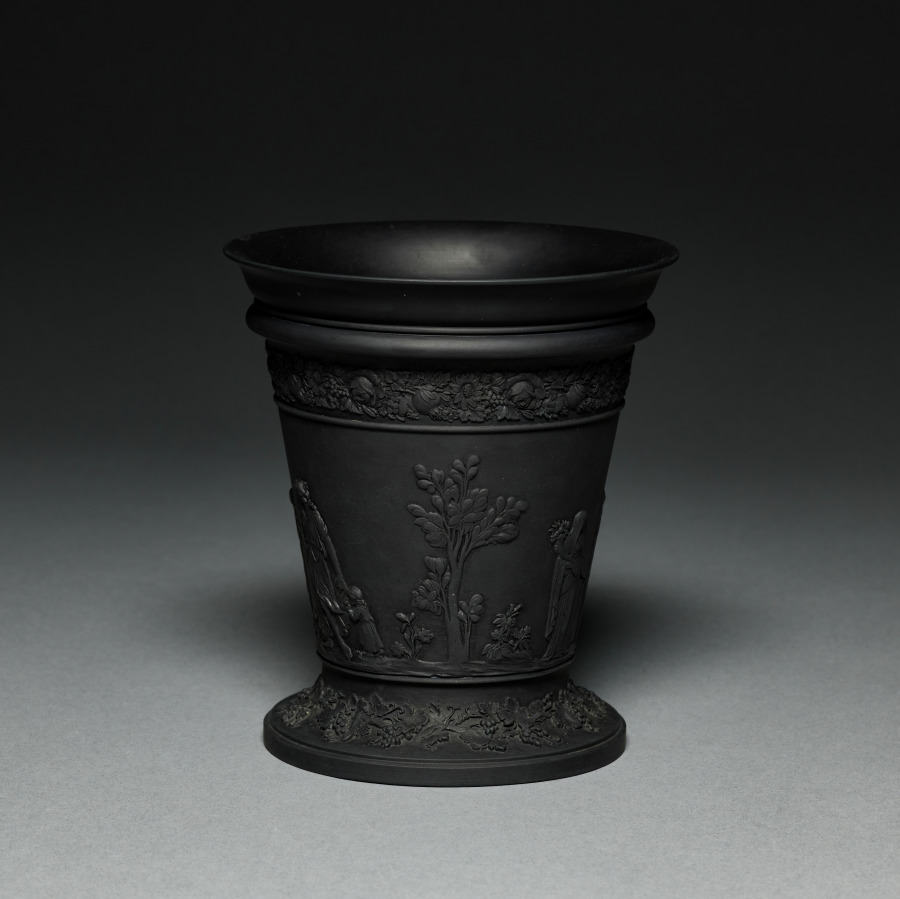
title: Jardiniere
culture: England, Staffordshire, 18th century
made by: Wedgwood Factory (British)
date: late 1700s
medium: black basalt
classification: Ceramic